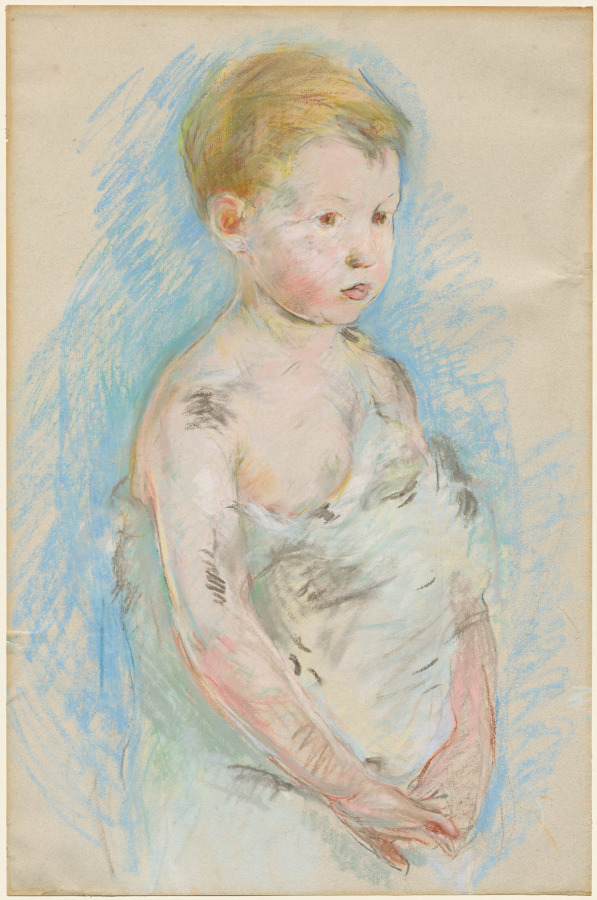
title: Young Saint John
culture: France, 19th century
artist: Berthe Morisot (French, 1841–1895)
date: 1890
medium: pastel on pale blue laid paper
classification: Drawing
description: In the spring of 1890 Berthe Morisot and her husband, Eugène Manet, rented a house with a garden overlooking the Seine River in the rural French town of Mézy. Morisot worked in the attic studio while the pair was there. A young boy from the village served as the model for this pastel, one of several studies for a full-length painting of Saint John the Baptist with his cross. In this drawing, Morisot developed the loose and sketchy marks that would characterize her final canvas.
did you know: This pastel's first owner was Berthe Morisot's daughter, Julie Manet, and her husband Ernest Rouart.